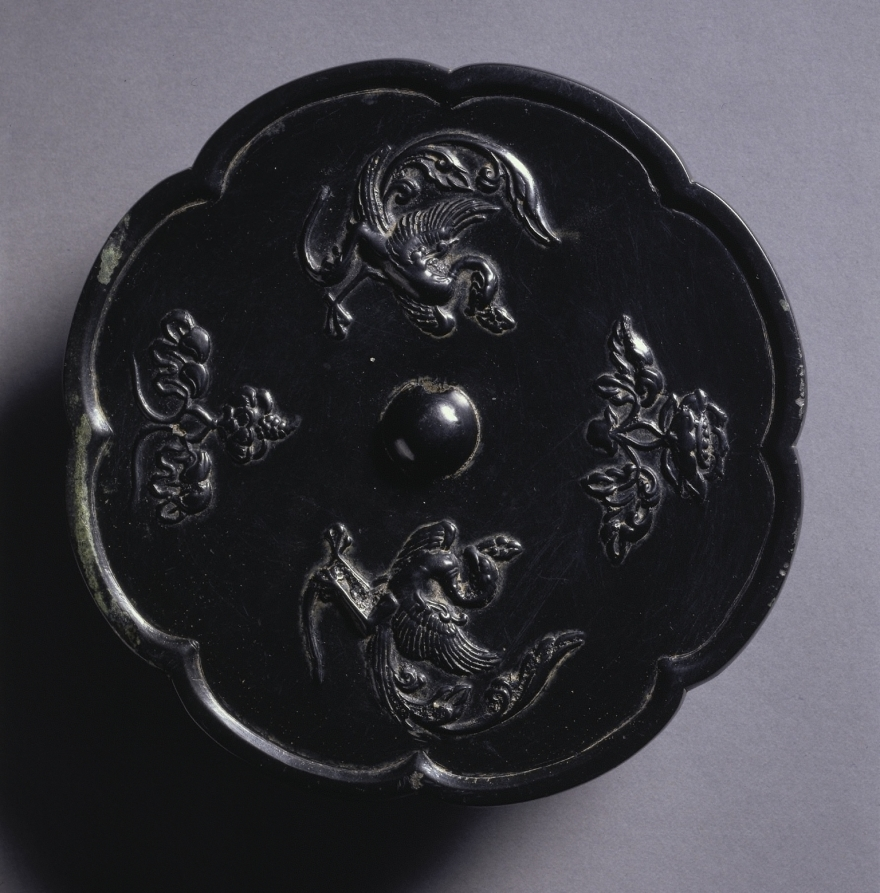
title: Lobed Mirror with Paired Phoenixes and Floral Displays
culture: China, Tang dynasty (618-907)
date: 700s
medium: bronze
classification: Metalwork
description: Lobed Mirror with Two Phoenixes and Floral Displays, 8th century ad China, Tang dynasty (ad 618-907) CMA 1995.348 [Cat. no. 66.a]